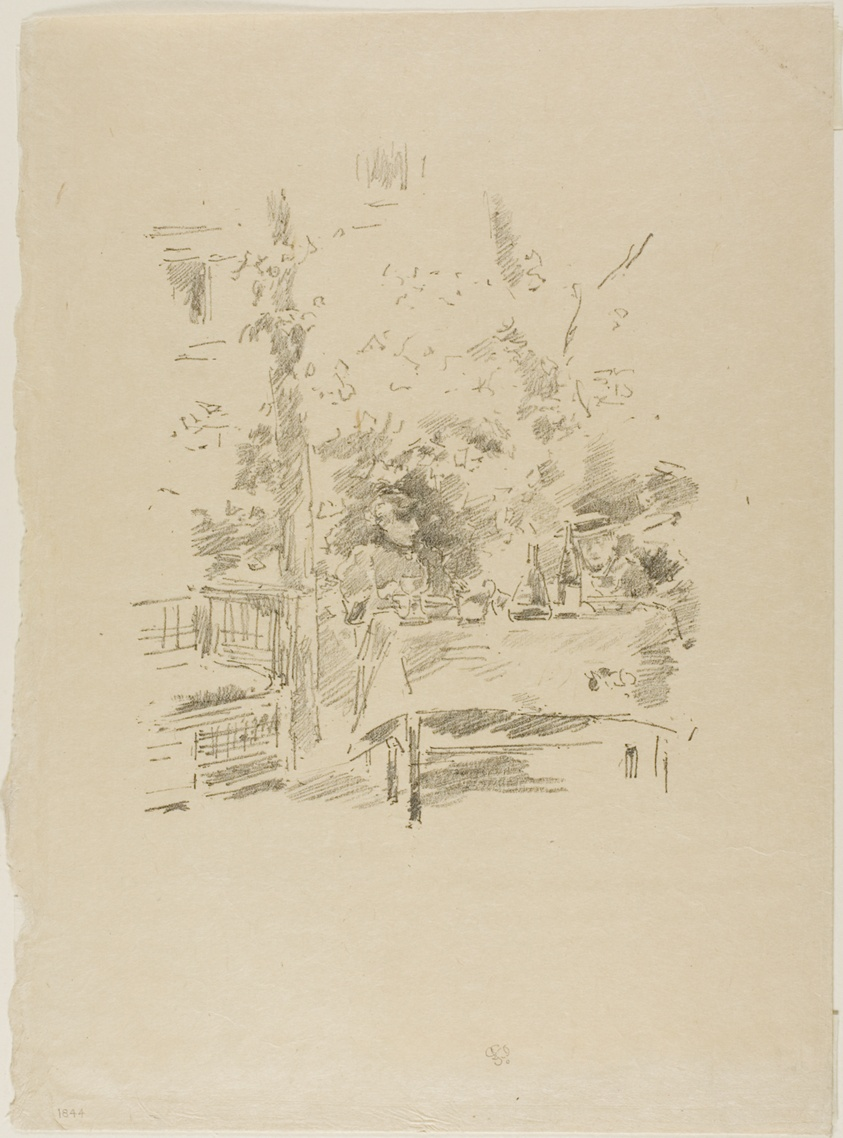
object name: Print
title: Tête-à-tête in the garden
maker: James McNeill Whistler (American, 1834-1903)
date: 1894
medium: Transfer lithograph in black on cream laid Japanese vellum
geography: United States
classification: transfer lithograph; lithograph; print; prints and drawing